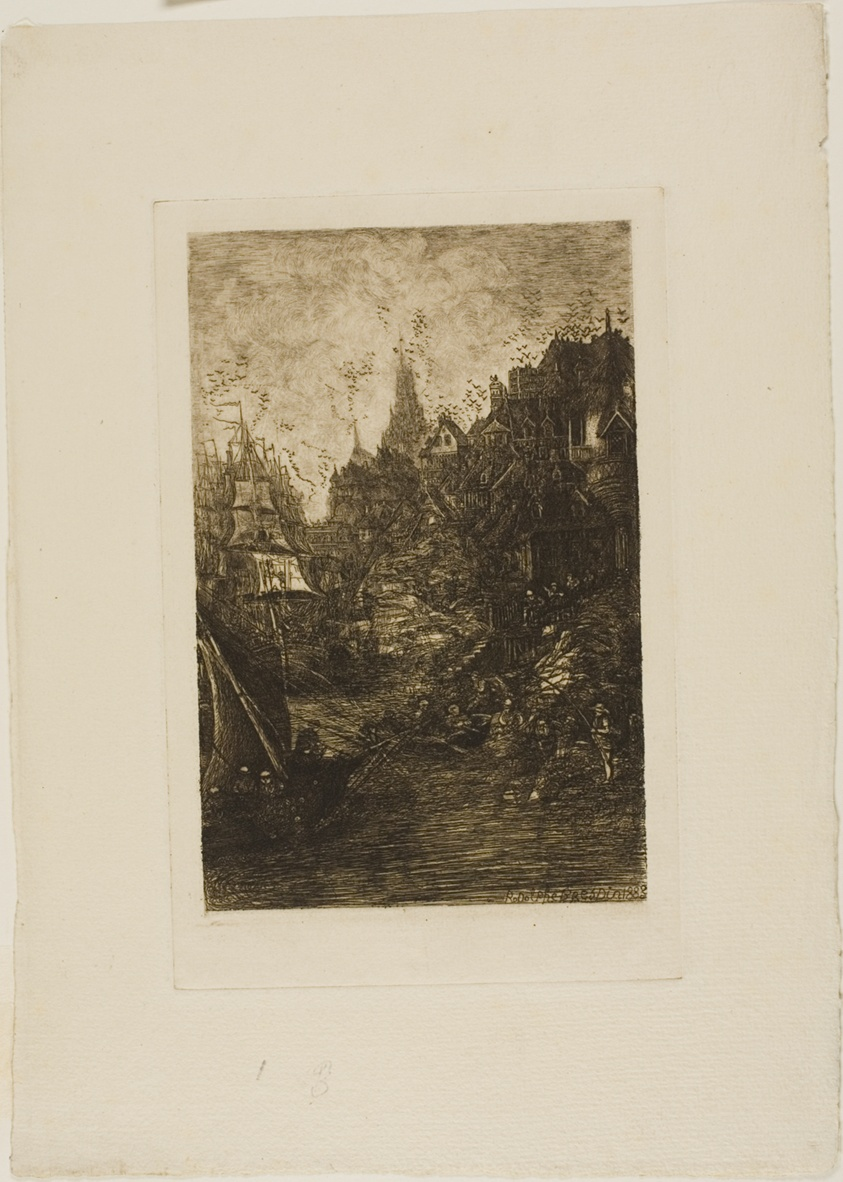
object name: Print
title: My Dream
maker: Rodolphe Bresdin (French, 1825-1885)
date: 1883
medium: Etching on cream laid paper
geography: France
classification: etching; print; prints and drawing